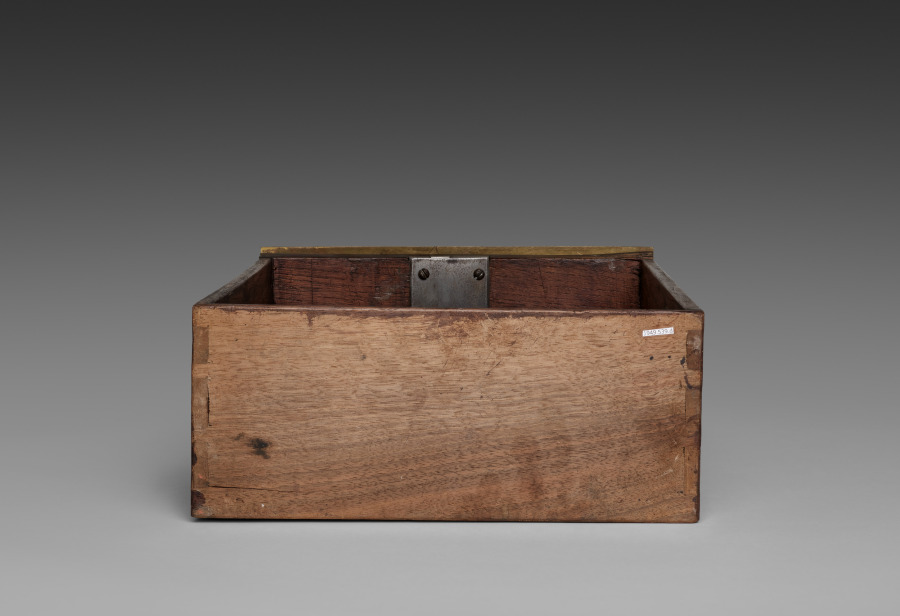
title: Side Drawer for Cabinet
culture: France, late 17th Century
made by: André-Charles Boulle (French, 1642–1732)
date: c. 1690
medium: ebony, marquetry in metal and tortoise shell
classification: Furniture and woodwork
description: Appointed cabinetmaker to King Louis XIV in 1672, André-Charles Boulle became a master of furniture making in France during the late 1600s until his death in 1732. Known primarily for his use of marquetry, in which metal patterns are inlaid into tortoiseshell then applied within the veneered surface of the furniture, Boulle established a level of quality and craftsmanship few others could achieve. As a result, his work found favor at the royal court and among other aristocrats and diplomats eager to impress the king. The inclusion of a medallion depicting Louis XIV within the bronze decoration of this chest would have identified the owner with the royal court. Often exhibiting stout architectural proportions with elegant groups of inlaid motifs such as the parrot on the central panel of this chest, Boulle’s designs are an example of the intellectual fashion for contrasting ideas, materials, and motifs.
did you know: Originally designed to sit atop an elaborate tall stand, this chest was likely altered in the late 1700s to reduce its scale and height.